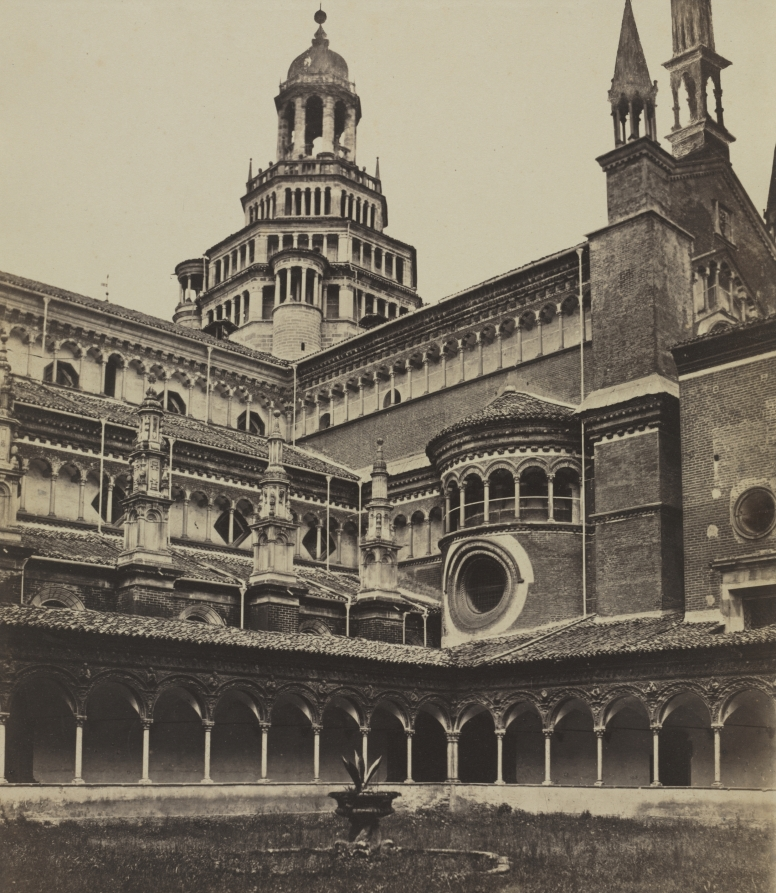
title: The Small Cloister of the Monastery at Pavia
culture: Italy, 19th century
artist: attributed to Maurizio Lotze (Italian, 1809–1890)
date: c. 1860s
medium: albumen print from wet collodion negative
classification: Photograph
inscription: Written in pencil on recto of mount: "Petit cloistre de la Chartreuse de Pavie"; "F0190"